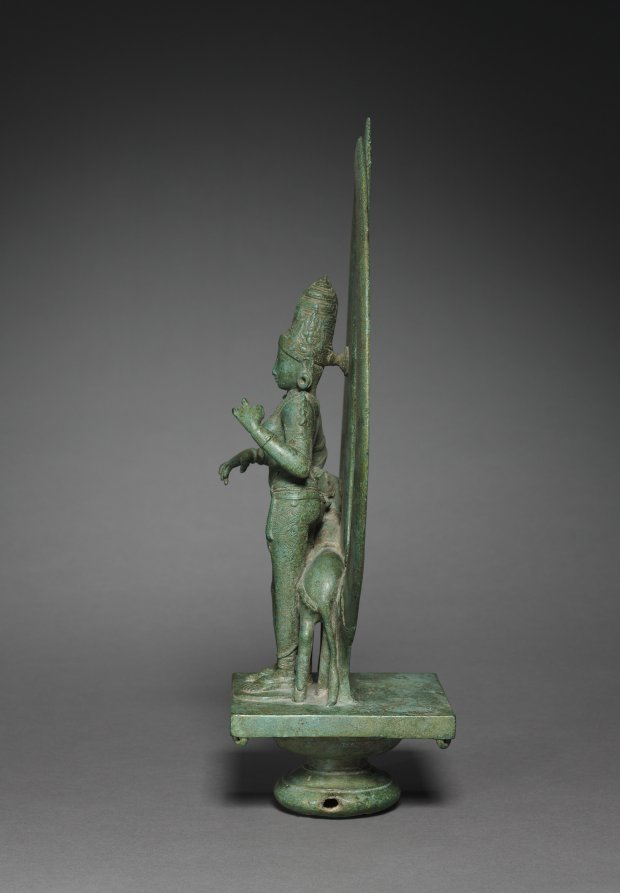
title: Trident with Shiva as Half-Woman (Ardhanarishvara)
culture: South India, Tamil Nadu, Chola period (900-13th Century)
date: c. 1050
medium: bronze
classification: Sculpture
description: The form of the trident—the main weapon of the Hindu god Shiva—dramatically and elegantly encircles his form in which the left side is female and the right side is male. The male side has the matted locks of a yogi piled high on his head; he holds an ax and leans on his mount, the bull. The female side has a jeweled crown, earring, full breast, broad hips, long skirt, and only one arm. The lower hands probably held a stringed instrument. This particular iconic form of Shiva visually indicates that he embodies all phenomena, even if they seem contradictory. He is male and female, destructive and creative, yogi and royal sovereign, hunter and musician.